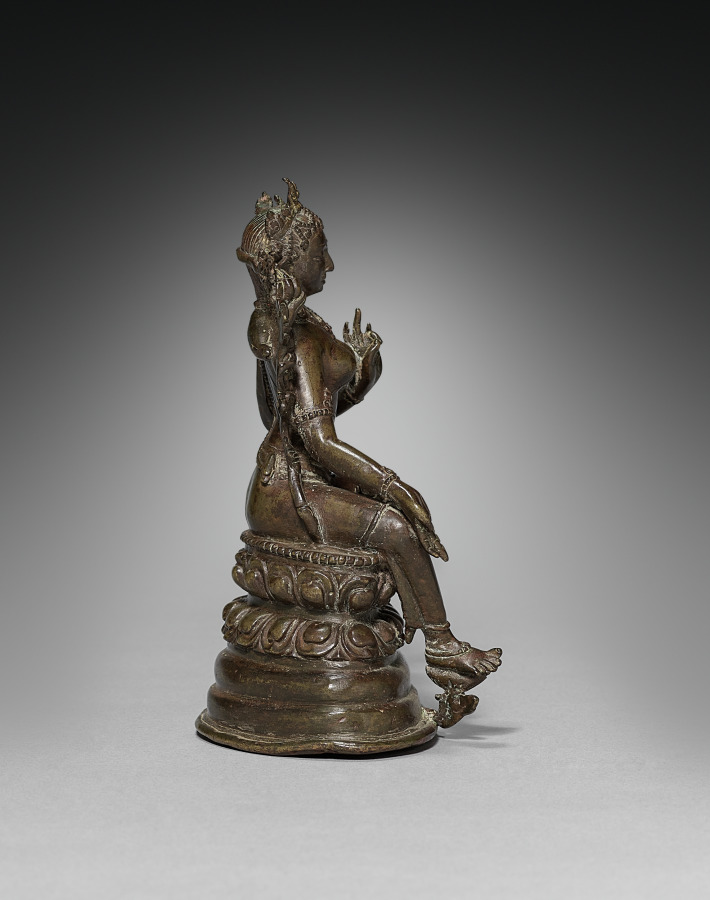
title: Seated Tara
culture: India, Bengal, late Pala dynasty, 12th Century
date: 1100s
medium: bronze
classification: Sculpture